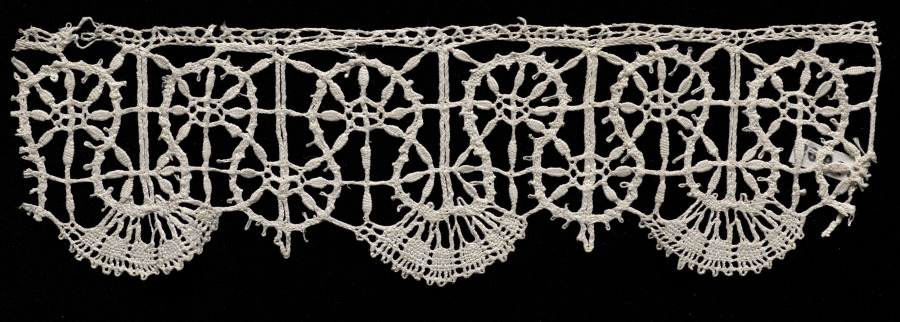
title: Lace Edging with Bell Points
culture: Italy, Genoa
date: 1600–1650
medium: Bobbin lace (rose lace)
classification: Lace